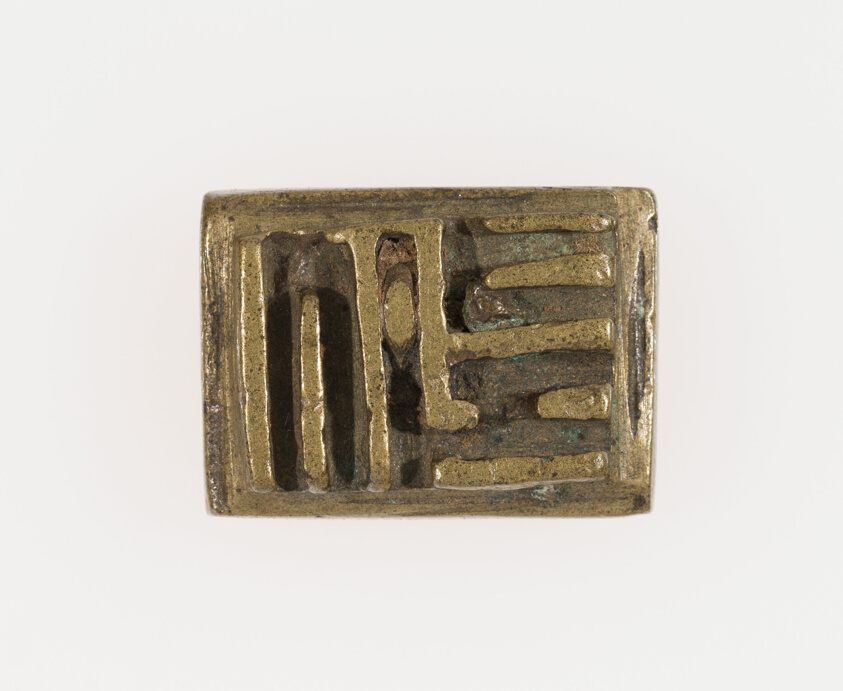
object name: Decorative Arts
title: Goldweight with a Geometric Design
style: asante, Arts of Africa, akan, african Art, Coastal West Africa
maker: Asante or related Akan-speaking peoples; Ghana; Coastal West Africa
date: 18th/19th century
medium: Copper alloy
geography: Ghana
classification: gold-weight; metal; arts of Africa; measure; african art; decorative arts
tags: geometric motif